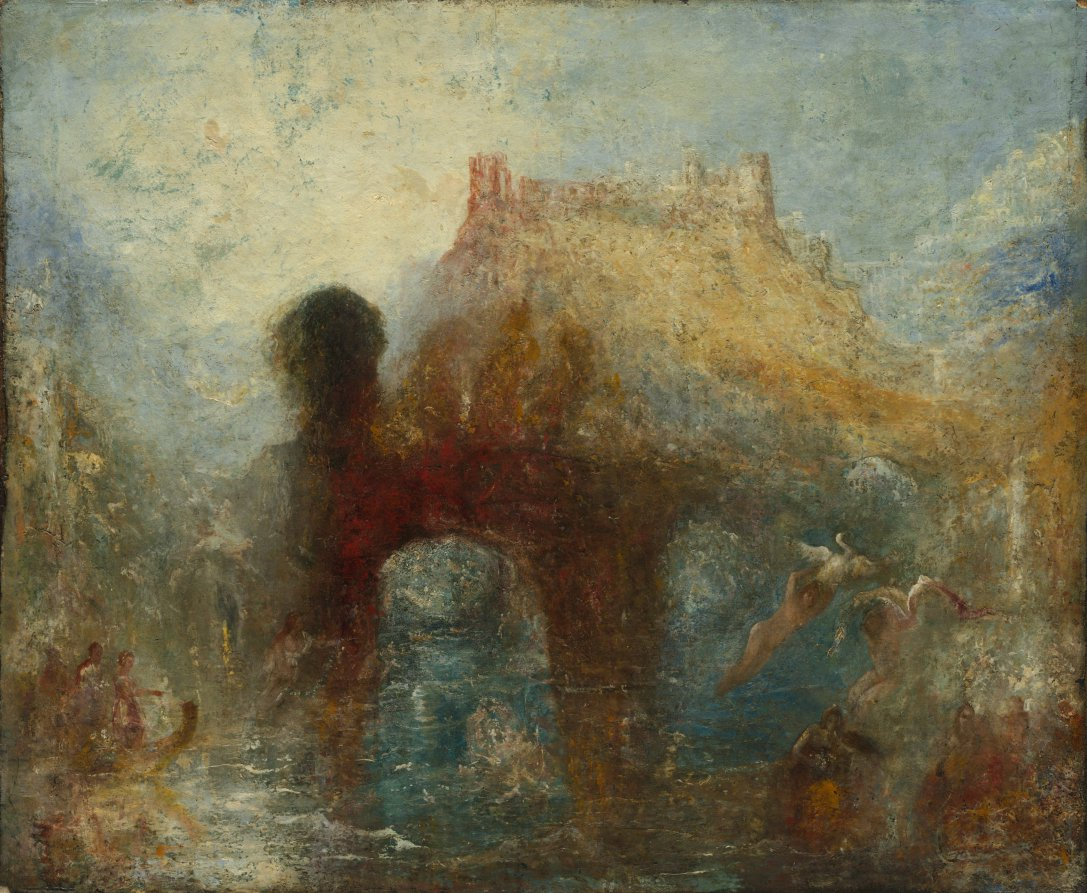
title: Queen Mab's Cave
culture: England, 19th century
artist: imitator of Joseph Mallord William Turner (British, 1775–1851)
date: after 1846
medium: oil on fabric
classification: Painting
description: This work is a reduced copy of a painting first exhibited by Turner at the British Institution in 1846 that passed, with the rest of his immense bequest to the nation, into the collections of the National Gallery and finally, in 1954, the Tate Gallery. Several lines from Shakespeare's A Midsummer Night's Dream and Turner's manuscript poem "Fallacies of Hope" were appended to the title in the British Institution catalogue, but they did little to explicate the nearly unintelligible concoction of fairies and Welsh ruins that make up this composition. Copies of Queen Mab's Cave by anonymous artists are abundant.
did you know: Queen Mab is a miniature fairy from English folklore who inspires dreams and plays pranks on people during the night. Shakespeare refers to her in both Romeo and Juliet and A Midsummer Night’s Dream,